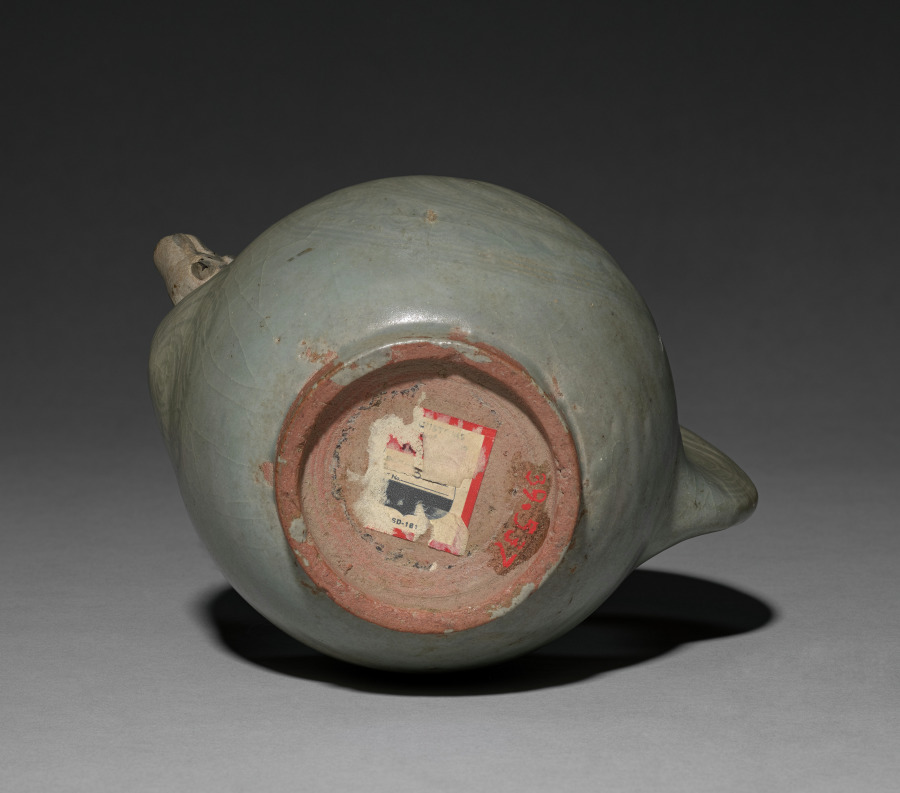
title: Pouring Vessel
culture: Siam, Sawankhalok ware, late 13th-14th Century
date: late 1200s-1300s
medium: stoneware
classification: Ceramic